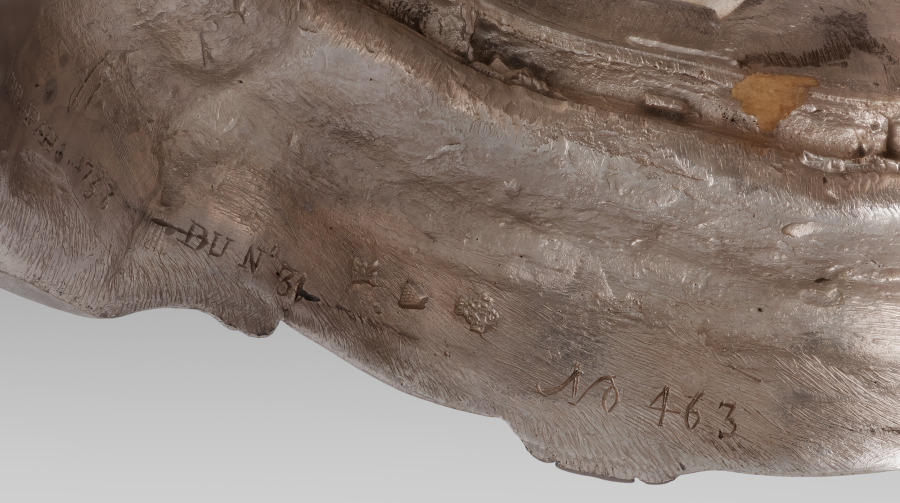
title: Candelabrum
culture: France, Paris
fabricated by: François Thomas Germain (French, 1726–1791)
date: 1757–1758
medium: silver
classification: Silver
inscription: [Maker’s mark of Francois-Thomas Germain, beneath base]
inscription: [Charge mark of Eloy Brichard, 1756−1762, beneath base]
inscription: [Warden's mark For Paris, 1757−1758, beneath base]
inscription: [Discharge mark for work intended for export, 1756−1775, beneath base]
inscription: [Discharge mark for work intended for export, 1756−1775, on base]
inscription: [Hallmarks for Saint Petersburg, on base]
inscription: [Assay mark of Ivan Frolov, on base]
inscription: [Russian standard of the French silver, on base]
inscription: [Maker’s mark of Francois-Thomas Germain, master silversmith on October 16, 1748, beneath drip pan of each three bobeches]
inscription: [Charge Mark Of Eloy Brichard, 1756−1762, beneath drip pan of each three bobeches]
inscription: [Discharge mark for work intended for export, probably 1733−1775, beneath drip pan of each three bobeches]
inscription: [Warden's mark for Paris, 1757-1758, beneath drip pan of each three bobeches]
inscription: [Russian standard of the French silver, beneath drip pan of one of three bobeches]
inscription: [Assay mark of Ivan Frolov, beneath drip pan of one of three bobeches]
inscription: [Charge mark for large work of Eloy Brichard, 1756−1762, on bayonet attachment of candelabra]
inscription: [Warden's mark for Paris, 1757-1758, on bayonet attachment of candelabra]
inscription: [Illegible mark in a square, on one bobeche]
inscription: [Engraved beneath base]: “Fait. Par. F. T. Germain. Sculp[teu]r. Orf[ev]re. Du Roy. Aux. Galleries. Du Louvre. A Paris- 1758”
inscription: [Engraved beneath base]: "Du no. 31"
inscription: [Beneath base]:"No 463"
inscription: [Russian Imperial Coat-of-arms, engraved beneath base]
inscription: [Modern inscription with black ink, beneath base]: "L5 ... 51/w-8"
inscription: [Modern inscription (illegible) in a rectangular paper label on the base, engraved. Cipher composed with two “M”’s (?) surmounted by a royal crown]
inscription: [Engraved on candelabra bayonet attachment]: "No 463"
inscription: [On candelabra bayonet attachment]: "du No 31"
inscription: [Engraved cipher with two "M"s (?) surmounted by a royal crown, on one bobeche]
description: This candelabrum is part of a pair. Its design blurs the line between function and decoration. The arms twist and curve, visually flower stems while physically supporting the candles. Though this visual unity is typical of the rococo style, the influence of the rising neoclassical style is evident in the allegorical scenes of light that decorate each candelabra’s stem.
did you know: These candelabra are part of a dinner service sent from Paris, France to Saint-Petersburg, Russia in two separate shipments, the first of which contained 270 objects for 8 dozen place settings.